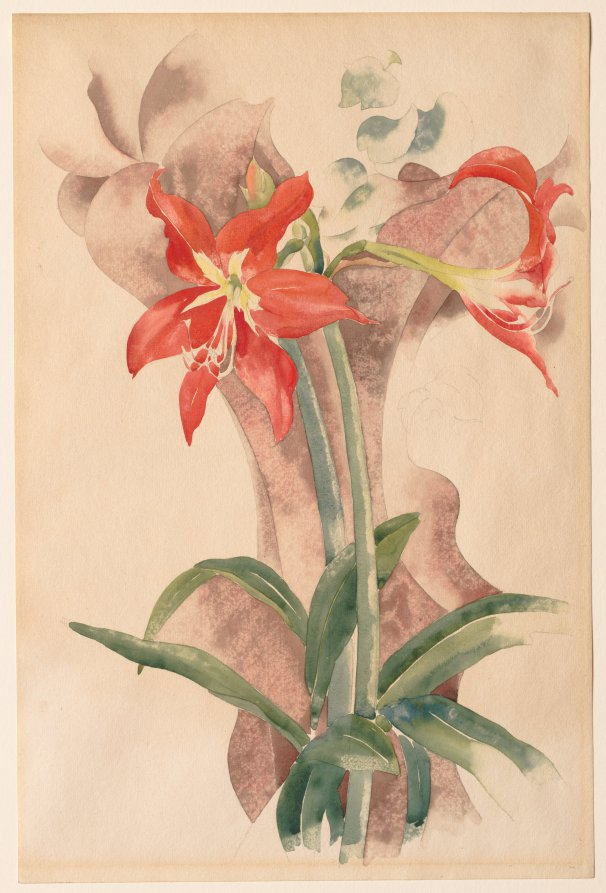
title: Amaryllis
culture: America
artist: Charles Demuth (American, 1883–1935)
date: c. 1923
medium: watercolor over graphite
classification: Drawing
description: Still-life was one of Charles Demuth's favorite genres, and he created works on this theme throughout his career. This drawing of a blooming amaryllis was completed while the artist was convalescing with diabetes in his hometown of Lancaster, Pennsylvania. Because of his physical weakness, he was limited to working in watercolor, a less demanding medium than painting, and to subjects that he could easily observe, such as flowers. Demuth drew the amaryllis's form in graphite and then brushed on watercolor precisely, using a blotter to develop the pebbly texture seen throughout.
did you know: This watercolor was purchased by the museum during its first exhibition, at Daniel Gallery in New York, and was one of the first works by Charles Demuth to enter a public museum collection.